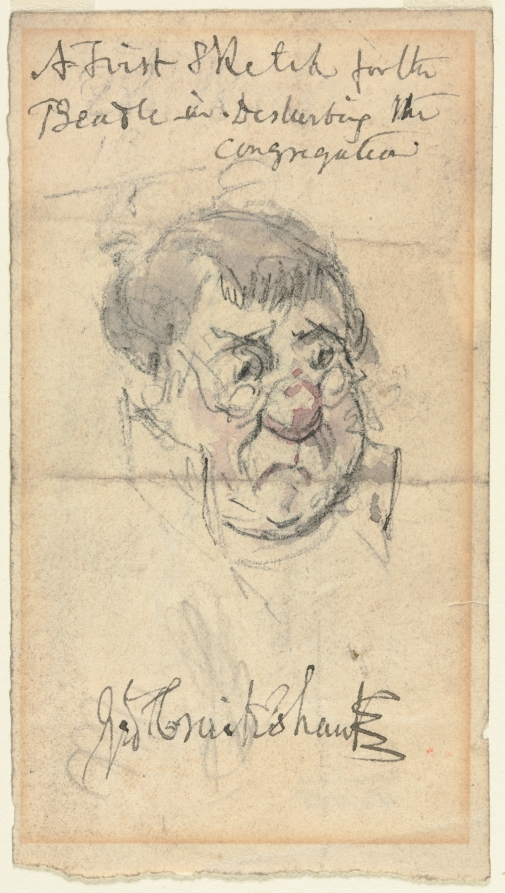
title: The Beadle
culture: England, 19th century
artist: George Cruikshank (British, 1792–1878)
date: c. 1805–78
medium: graphite, pen and brown ink, brown and red wash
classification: Drawing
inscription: Signed across bottom of page in ink: "Geo Cruikshank"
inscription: Inscribed across top of page in ink: "A First Sketch For The/Beadle In Disturbing The/Congregation"